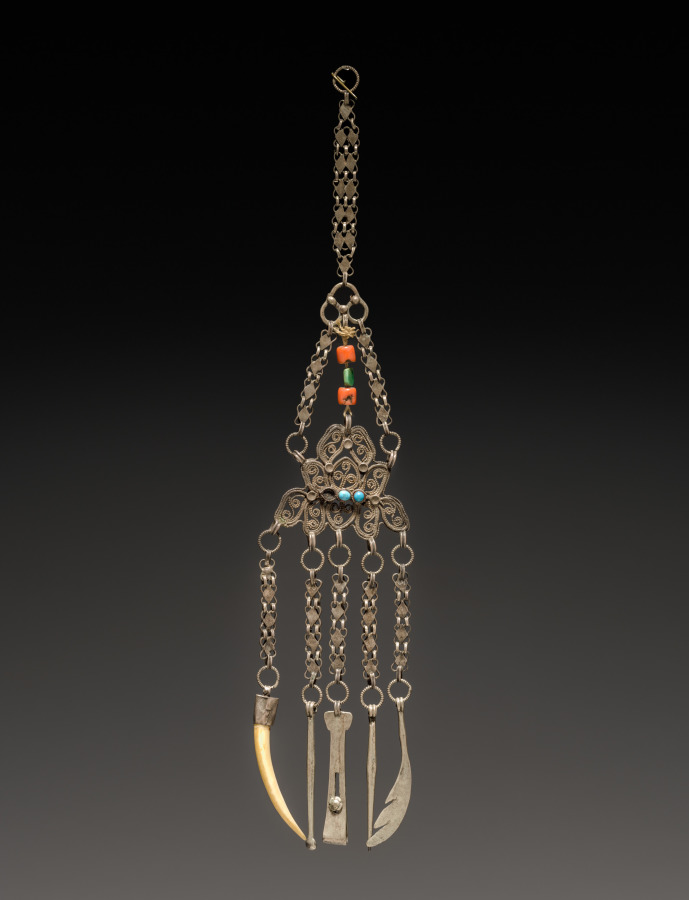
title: Chatelaine with Toilet Articles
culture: Tibet (or Nepal), 19th century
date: 1800s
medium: silver with semiprecious stones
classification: Jewelry